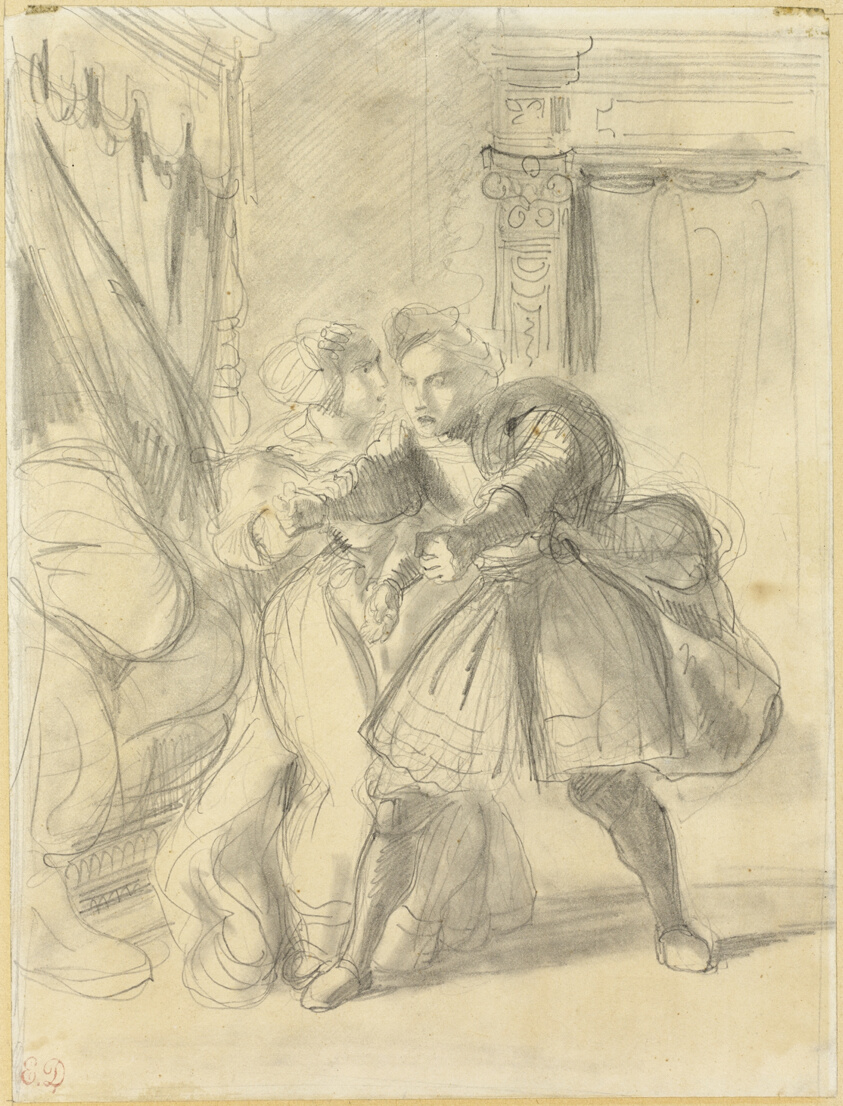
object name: Drawing and Watercolor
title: Study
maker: Eugène Delacroix (French, 1798-1863)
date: 1836/1843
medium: Graphite and stumping on cream wove paper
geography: France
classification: graphite; drawings (visual works); prints and drawing